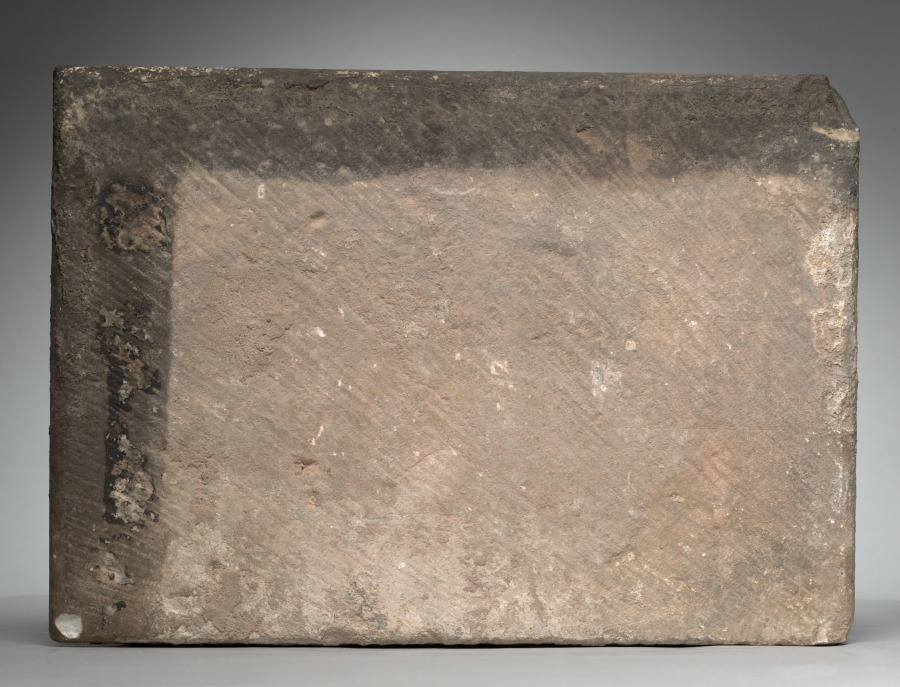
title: Engaged Capital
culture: Southern France, Abbey of Larreule, near Tarbes, 15th century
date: 1400s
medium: limestone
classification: Sculpture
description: This capital belongs to a surviving group including other architectural fragments that once decorated the cloister of the Abbey of Larreule. A cloister was a covered walkway or arcade, usually around all four sides of a square area of grass (the "cloister garth"). The seclusion of the cloister was the monks’ exclusive domain, off limits to others. Here, the monks were supposed to pray, study, meditate, and exercise in privacy and solitude. Such cloister capitals served both to instruct the monks and as a focus for their devotions. Other capitals in this series are installed in the Jardin Massey at Tarbes, near the original abbey. An arch from Larreule has been assembled with other associated French capitals at The Cloisters in New York.